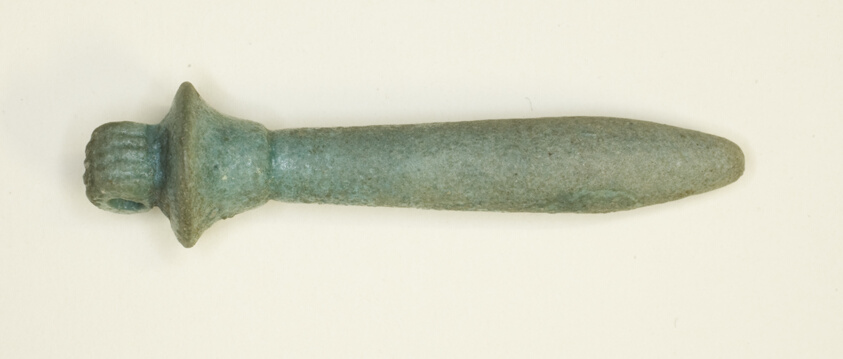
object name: Costume and Accessories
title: Amulet of a Papyrus Column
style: late period (egyptian)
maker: Egyptian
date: Late Period, Dynasty 26–30 (664–343 BCE)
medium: Faience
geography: Egypt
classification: amulet; jewelry; ceramics; ancient art; costume; faïence (composite material)